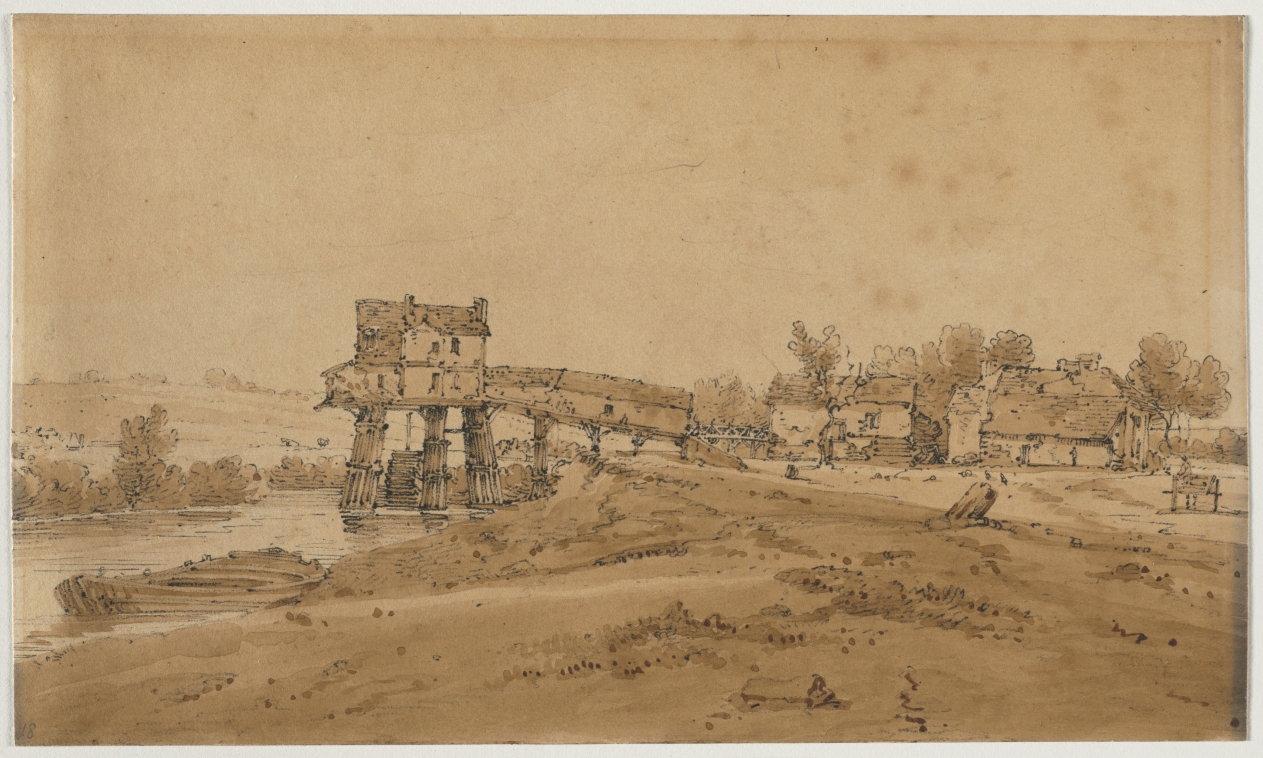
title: A Selection of Twenty of the Most Picturesque Views in Paris: The Watermill above the Bridge at Charenton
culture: England, early 19th Century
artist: Thomas Girtin (British, 1775–1802)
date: 1802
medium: soft-ground etching with bistre wash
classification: Print